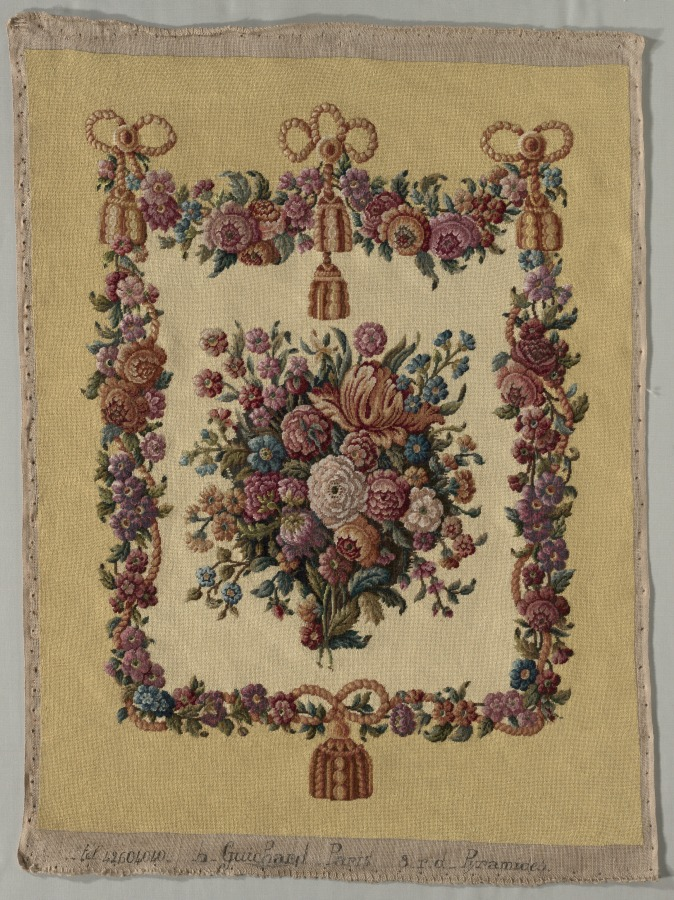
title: Textile Panel for Fire Screen (replacement)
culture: France, Paris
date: c. 1780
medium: needlepoint, wool on linen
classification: Textile